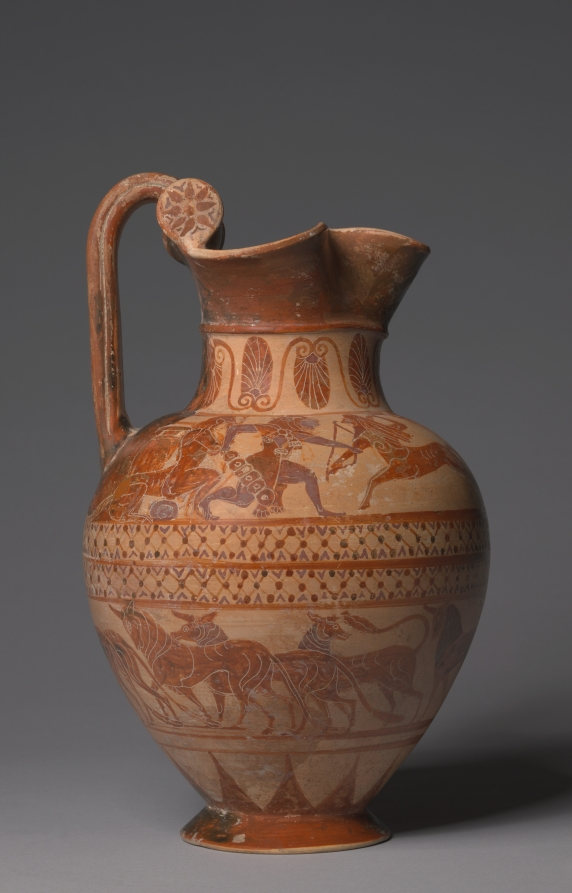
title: Black-Figure Oinochoe (Wine Jug): Hercle (Herakles) and Pholos; Cattle (of Geryon?)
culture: Etruscan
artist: attributed to Tityos Painter (Etruscan, active at Vulci c. 530–510 BCE)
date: c. 520 BCE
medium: ceramic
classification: Ceramic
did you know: This oinochoe or wine pitcher is a type of pottery made by the Etruscans or pre-Italic peoples.